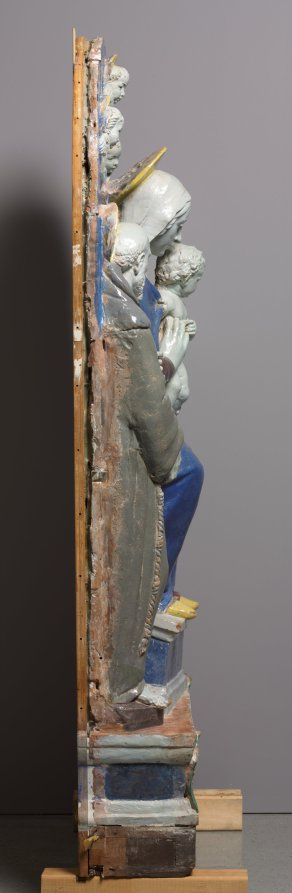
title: Virgin and Child Enthroned with Saints Francis and Giovanni Gualberto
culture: Italy, Florence, 16th century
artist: Benedetto Buglioni (Italian, 1461–1521)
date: c. 1510–20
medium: glazed terracotta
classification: Sculpture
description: The Madonna sits upon a throne with the Christ child standing on her knee. He is steadied by his mother, turning delicately to grasp her robe for support. On the left is Saint Francis, identified by his stigmata. On the right, Saint Giovanni Gualberto is identified by his monk's robe and distinctive processional cross. The brown robes of the saints, the purple of the Virgin's tunic, and the flesh tones of the figures contrast strongly against the bright blue background. In the semicircular sky behind the figures, three winged cherub heads emerge, representing a host of angels. Glazed terracotta is both durable and decorative and the gleaming white of this piece would have stood out in the darkness of a church. The medium was made popular by Renaissance artist Luca della Robbia and came into fashion as a substitute for expensive carved marble. A rounded arch frame embellished with fruit and flower garlands as well as egg-and-dart and cord moldings accompanied the work when it was acquired, but was later determined not to be original and removed. Buglioni's work bears the influence of the della Robbias, particularly in the simple color scheme. Buglioni likely worked in the studio of Luca's nephew, Andrea, where he would have learned the technique of glazing terracotta.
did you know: The unusual purple hue is particular to the artist.